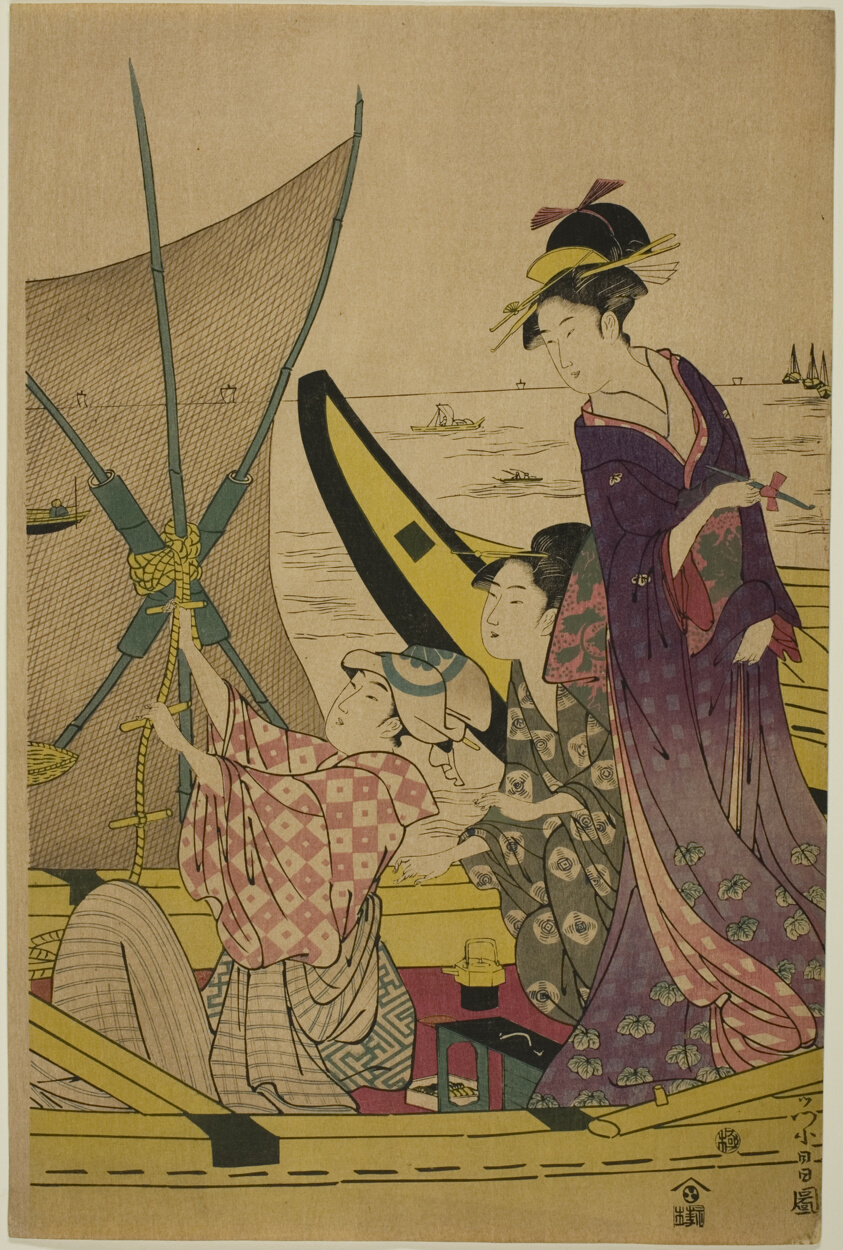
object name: Print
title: Women on a Fishing Boat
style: Japanese (culture or style)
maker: Chokosai Eisho (Japanese, active 1780-1800)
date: c. 1780/1800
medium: Color woodblock print; center sheet of oban triptych (right sheet: 1997.729a, left sheet: 1997.729c)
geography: Japan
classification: woodblock print; print